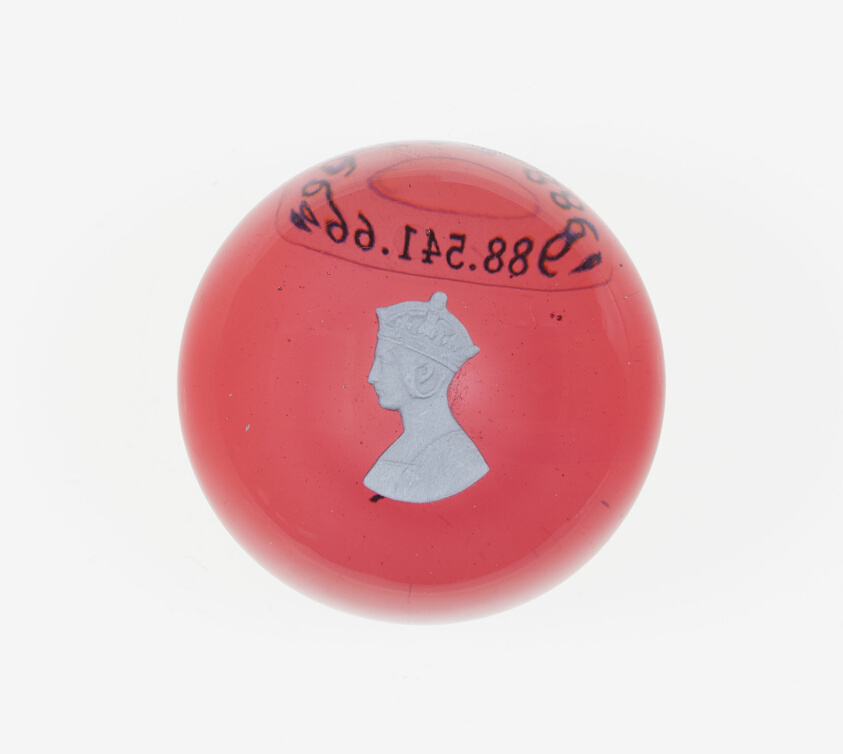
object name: Glass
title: Paperweight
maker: Clichy Glassworks (Cristalleries de Clichy); Clichy, France, 1837-1885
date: Mid 19th century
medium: Glass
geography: Clichy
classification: paperweight; glass